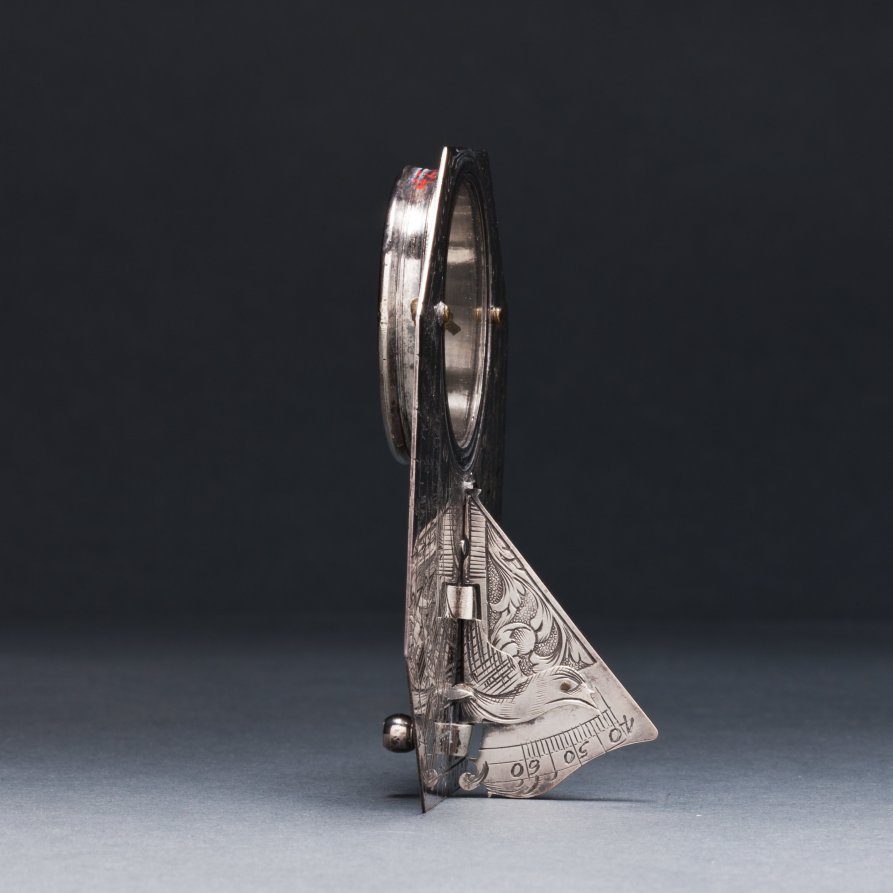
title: Butterfield Sundial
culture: France, 18th century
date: 1700s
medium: silver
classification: Silver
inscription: [Engraved signature above the compass in ribbon band]: "N. BION A Paris"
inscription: [Engraved on the face of the sundial]: “Pour 55° 4-5-6-7-8-9-10-11 50° IIII-V-VI-VII-VIII-IX-X-XI 45° 5-6-7-8-9-10-11 40° -VI-VII-VIII-IX-X-XI'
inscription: [Engraved on the other side]: "Pour 55° -8-7-6-5-4-3-2-1-0 50°-VIII-VII-VI-V-IIII-III-II-I 45°-8-7-6-5-4-3-2-1 40°-VII-VI-V-IIII-III-II-I"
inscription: [Engraved around the compass]: “NORD-OUEST-SUD-EST”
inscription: [Engraved on the back of the sundial]: “Turin 44 Milan 46 Paris 49 Lion 46 Metz 49 Rome 42 Liege 51 Naples 44 Namur 50 Gennes 44 Marseille 43 Grenoble 45 Bayonne 43 Bruxelle 51 Londres 52 Nantes 47 Vienne 48 Toulon 43 Tours 47 Lille 51”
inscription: [Engraved around the back of the compass]: “Venise 45 Strasbourg 49 Amsterdam 52 Hambourg 54 Varsovie 52 La Rochelle 46”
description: Butterfield-type sundials are characterized by their adjustable gnomons, metal flaps that cast a shadow on the dial’s face to indicate the hour, and geographical indices. This sundial has a scale adjustable between latitudes of 40° to 60° north. The latitudes of 26 European towns are engraved on its back for quick reference. With an intricately engraved silver face, it would have functioned as a fashionable traveler’s accessory.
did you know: Butterfield-style sundials were named after Micheal Butterfield, an English scientific and mathematical instrument maker who worked in Paris between 1674 and 1724.